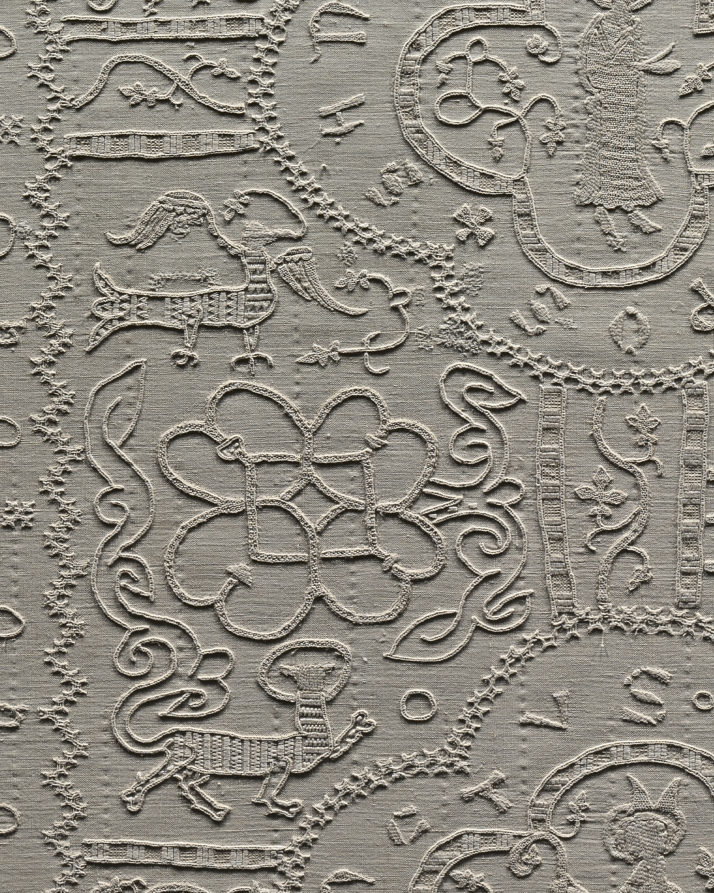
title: Altar Cloth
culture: Germany, Altenberg on the Lahn, Premonstratensian Convent, 14th century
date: c. 1350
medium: embroidery: linen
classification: Embroidery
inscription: various motifs enclosed in quatrefoils with identifying inscriptions in Gothic letters.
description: This large, embroidered altar cloth is one of the rarest, most important medieval church furnishings in existence. It was stitched by nuns in the Premonstratensian Convent in Altenberg on the Lahn River, north of Frankfurt, Germany, and was used to cover the church’s high altar in the weeks leading up to Easter. The cloth is an example of linen embroidery, a specialty of German nuns in the later Middle Ages. The Altenberg monastery church once had valuable furnishings; the high altar retable (a decorated frame with sculptures and paintings on the top of an altar) has survived, the main parts of which are now in the Städel Museum in Frankfurt, Germany.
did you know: When lit from behind, the previously hidden details emerge and the complex design becomes evident.